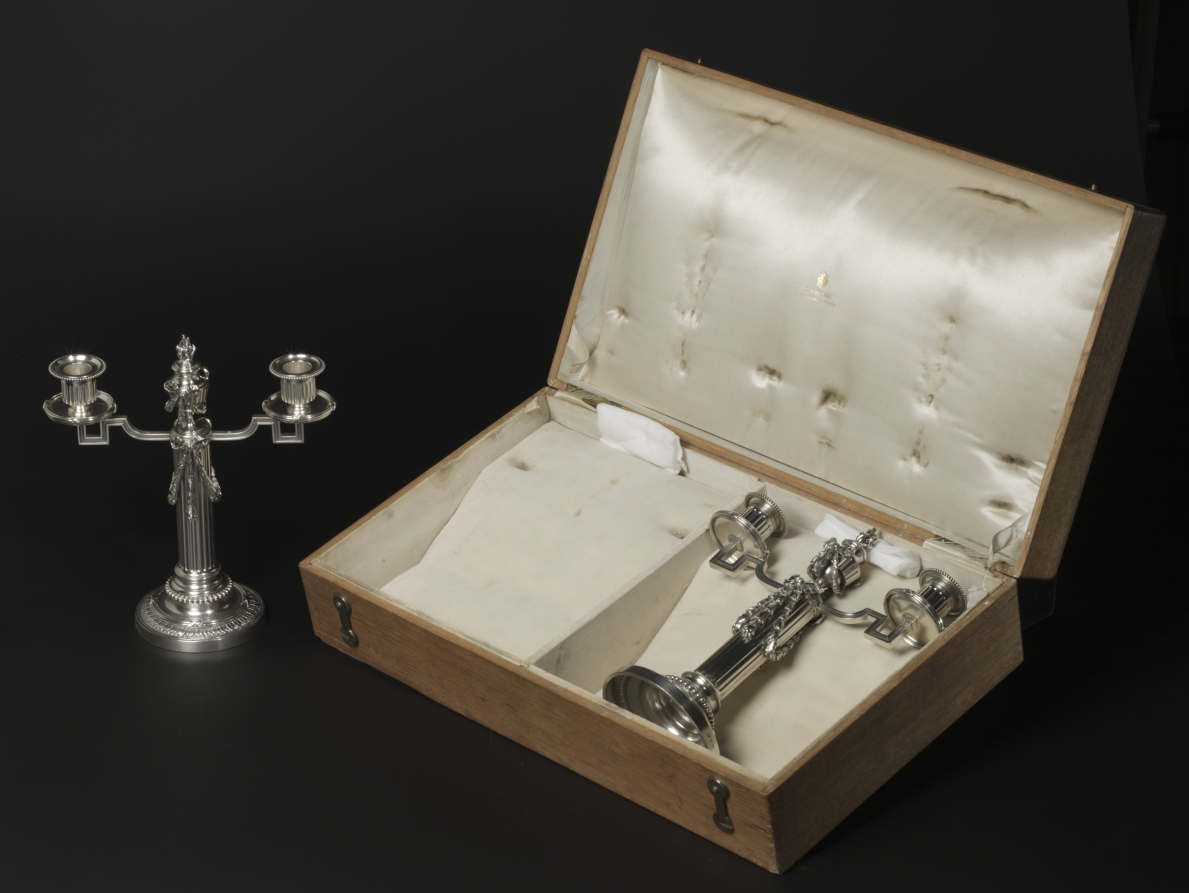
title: Pair of Candelabra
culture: Russia, St. Petersburg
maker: House of Fabergé (Russian, 1842–1918)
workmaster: Julius Alexandrovitch Rappoport (Russian, 1864–1916)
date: 1887–90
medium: silver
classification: Silver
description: This pair of candelabra demonstrates Fabergé’s commitment to a commercial balance between decorative and functional design. The pair was made by Fabergé’s chief silversmith, German-born Julius Rappoport, in Moscow, where the majority of gold and silver objects were crafted. Small in size, the pair may have been used in more intimate settings, as opposed to larger banquets or public gathering areas.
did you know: The design reflects the resurgence of the neoclassical style in the late 1800s.